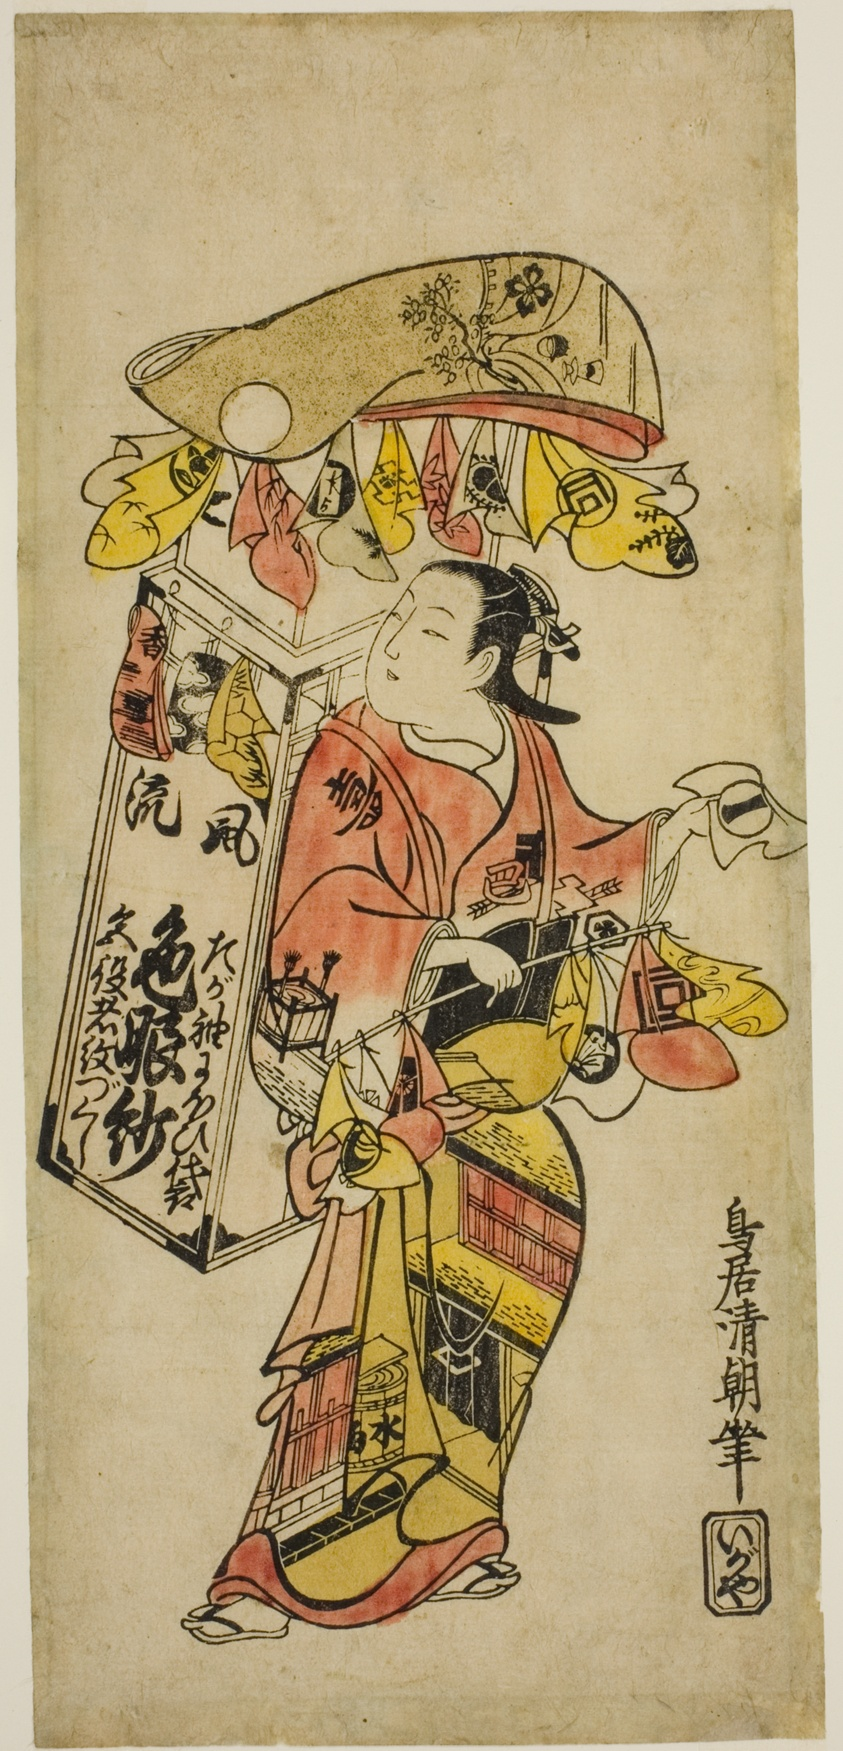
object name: Print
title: A Peddler of Colored Cloth (fukusa)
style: Japanese (culture or style)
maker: Torii Kiyotomo (Japanese, active c. 1717-36)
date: c. 1724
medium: Hand-colored woodblock print; hosoban, urushi-e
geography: Japan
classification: woodblock print; print; asian art